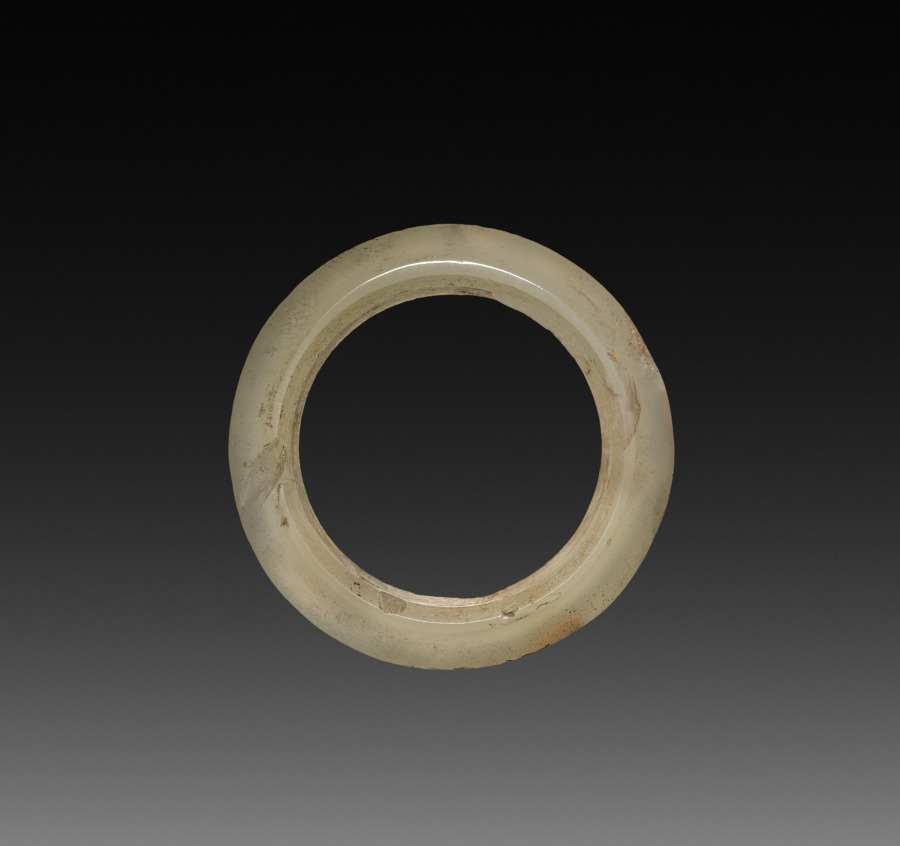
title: Ring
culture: China, Han dynasty (202 BCE–220 CE) or later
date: 200 CE or later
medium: agate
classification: Jewelry